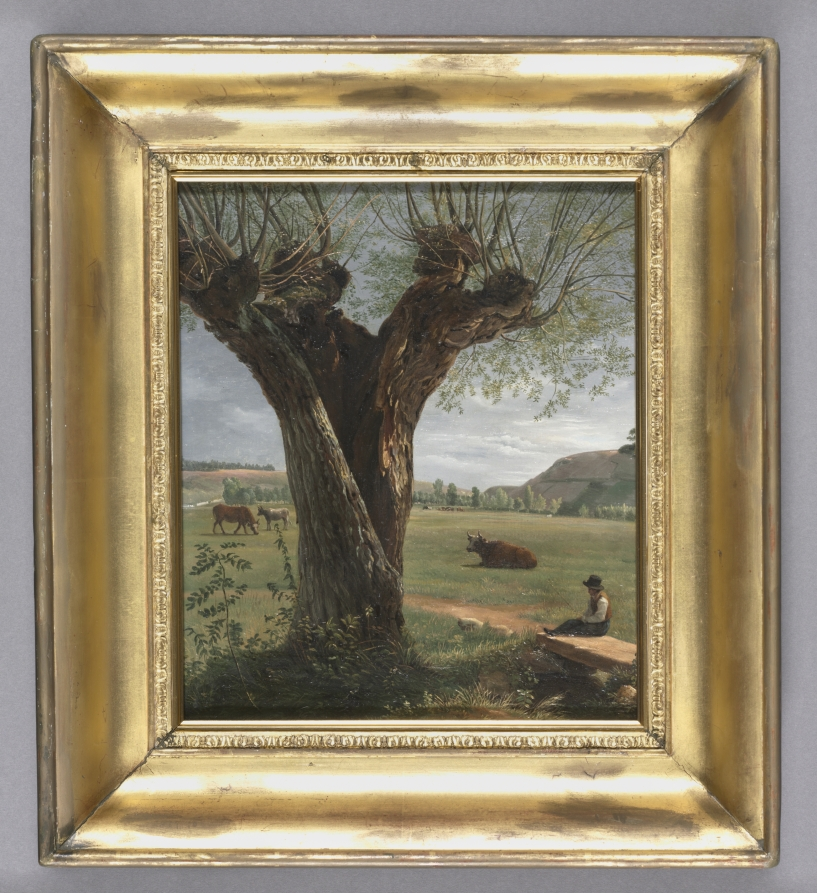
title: Pollard Willow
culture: France, 19th century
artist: Pierre Jean Boquet (French, 1751–1817)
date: after 1804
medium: oil on paper, mounted on canvas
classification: Painting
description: Little is known about Boquet's life, and his artistic origins remain obscure. His style and technique suggest that he received formal training, but where and with whom is unclear. An inscription on a painting attributed to Boquet implies that he spent time in Rome, where he would have seen works by 17th-century French artists such as Claude Lorrain. This may explain the gentle, bucolic atmosphere and the warm, golden light in Pollard Willow, characteristics of which recall the paintings of Lorrain and his contemporaries. The severe pruning or pollarding of trees, especially willows, was a common practice before the Industrial Revolution (about 1750–1850). The procedure allowed the tree to produce large numbers of shoots, which were used in basketry, fence construction, and as fodder for farm animals.